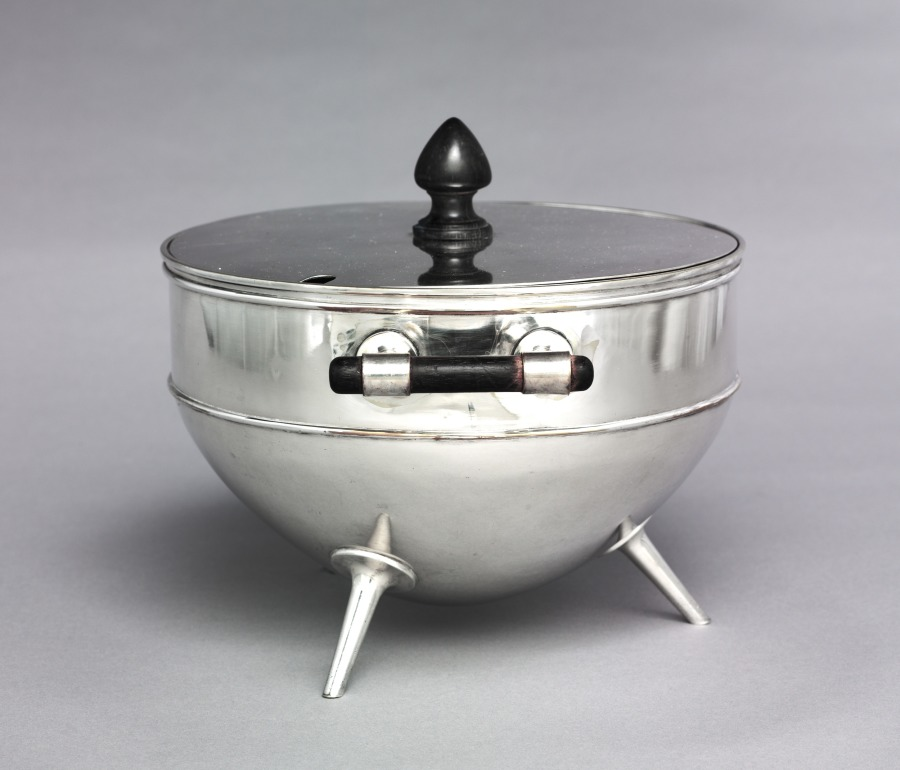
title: Covered Tureen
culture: England, 19th century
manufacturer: Hukin & Heath (British)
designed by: Christopher Dresser (British, 1834–1904)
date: c. 1880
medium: silver plated metal, ebony handles and knop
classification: Metalwork